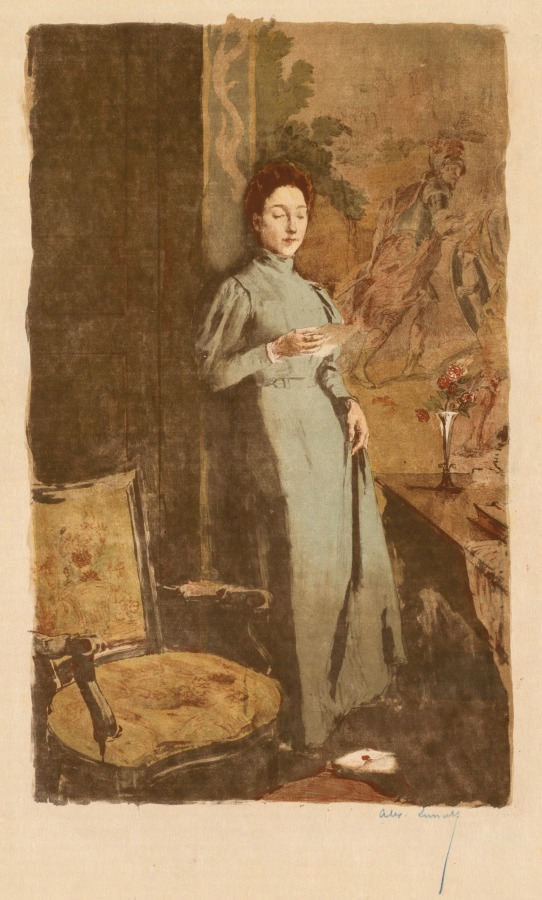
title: The Letter (La Lettre)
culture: France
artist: Alexandre Lunois (French, 1863–1916)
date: 1894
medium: color lithograph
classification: Print